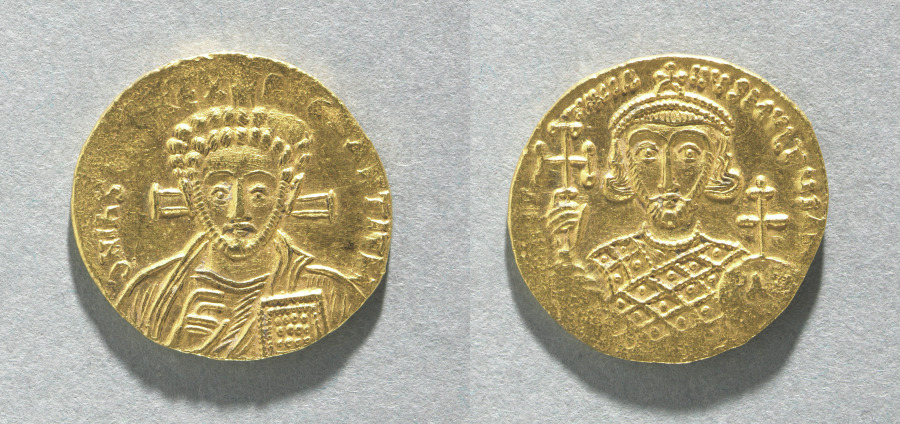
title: Solidus of Justinian II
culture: Byzantium, Constantinople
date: 705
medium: gold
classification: Coins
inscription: Obverse: Bust of Christ, facing, with mustache, close beard, and curly hair; wearing pallium over colobium, his right hand is raised in benediction; his left holds the book of gospels. Behind his head is a cross. Inscription: dN IhS ChS REX REGNANTIUM Reverse: Bust of Justinian II, with mustache and close beard, wearing loros and crown with cross on circlet. In right hand he holds a cross potent on base with three steps, in his left hand he holds a patriarchal cross on globe inscribed with the letters PAX Inscription: DN IUSTINIANUS MULTUS AN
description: Byzantine Gold Coins The vast number of surviving Byzantine coins attests to the level of trade across the empire. Controlled and supervised by the emperor, the producers of coins took care to represent his authority and reflect his stature. Talented artists were recruited to engrave the dies (molds) used for the striking of coins. Emperors increasingly came to include their heirs and co-emperors on their coinage, as well as other family members or even earlier rulers. Coins were recognized, then as now, as small, portable works of art. With their inscriptions and images, Byzantine coins provide valuable documentation of historical events and a record of the physical appearance of the emperors. The coins shown here include the solidus, the basic gold coin of 24 karats; the tremissis, a gold coin of one-third the weight and value of the solidus; and the nomisma, which in the 10th century replaced the solidus as the standard gold coin.